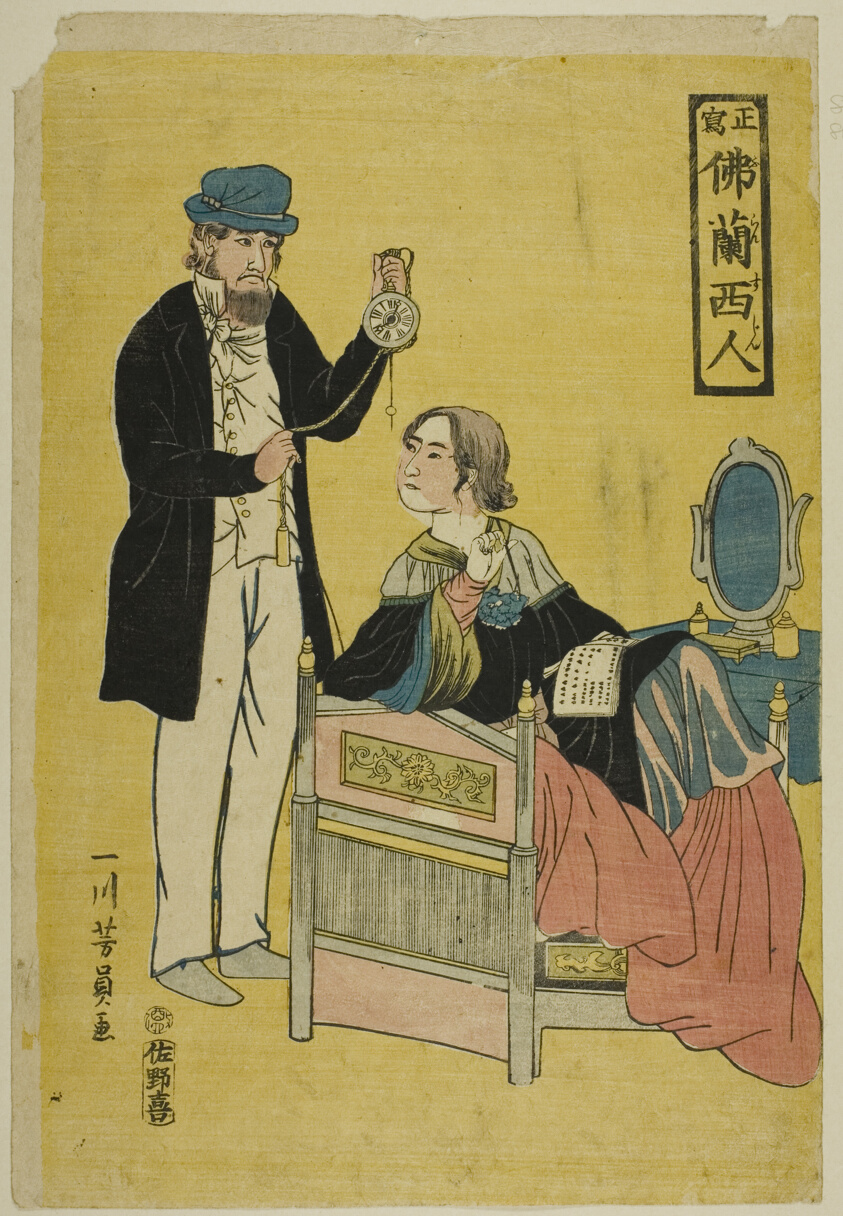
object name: Print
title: English officer and soldiers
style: Japanese (culture or style)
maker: Utagawa Yoshikazu (Japanese, active c. 1850–70)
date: 1861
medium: Color woodblock print; oban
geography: Japan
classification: woodblock print; print; asian art